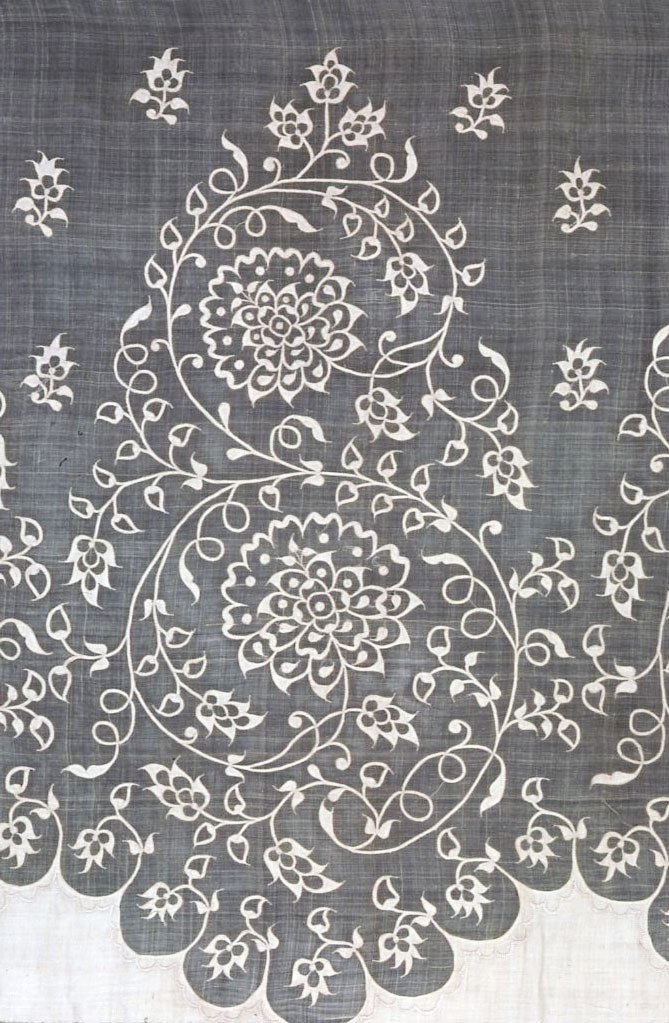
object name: Costume and Accessories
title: Skirt Panel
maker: Europe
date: c. 1850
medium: Hemp, plain weave; appliquéd with cotton, plain weave; embroidered with cotton in buttonhole stitches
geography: Europe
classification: textile; needlework (visual works); costume